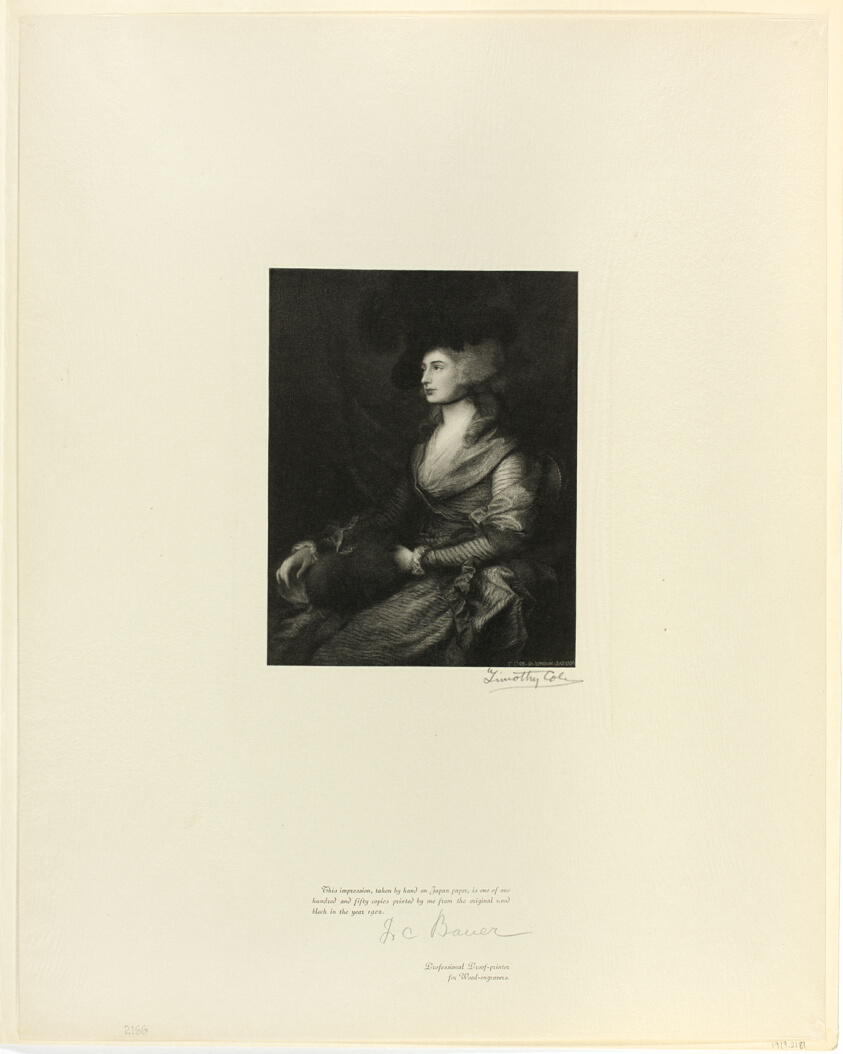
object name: Print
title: Portrait of Mrs. Siddons, from Old English Masters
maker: Timothy Cole (American, born England, 1852-1931); after Thomas Gainsborough (English, 1727-1788)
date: 1897, printed 1902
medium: Wood engraving on chine paper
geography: United States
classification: wood engraving; print; prints and drawing